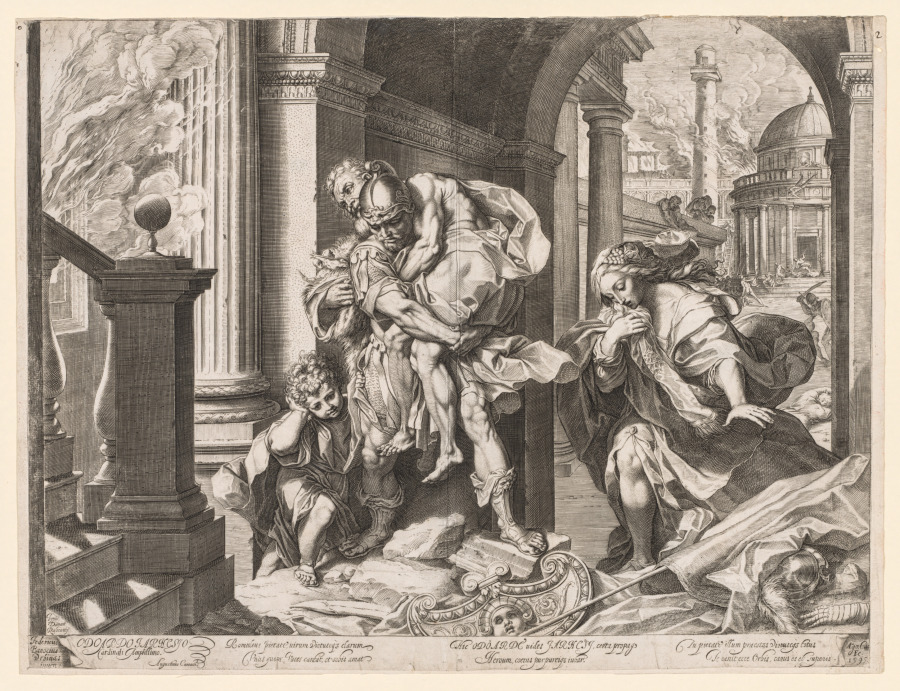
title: Aeneas and His Family Fleeing Troy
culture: Italy, 16th century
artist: Agostino Carracci (Italian, 1557–1602)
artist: after Federico Barocci (Italian, 1528–1612)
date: 1595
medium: engraving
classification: Print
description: Created at the end of the 1500s, this print stylistically marks the end of Renaissance art. Barocci’s swirling, emotional composition and the intensity of Agostino’s engraved network of lines prefigure the rise of Baroque art in the 1600s. However, ancient legends such as the Trojan War, revived and popularized during the Renaissance, continued to inspire artists for centuries to come. Here, Aeneas carries his elderly father Anchises, who in turn rescues small statues of their household gods while the city of Troy burns. Both acts stress the men’s virtuous dedication to home and family. Aeneas’s young son Ascanius and his wife Creusa flee with them, but Creusa’s separation from the group alludes to her fate: she falls behind and is lost as the Greeks invade the city.